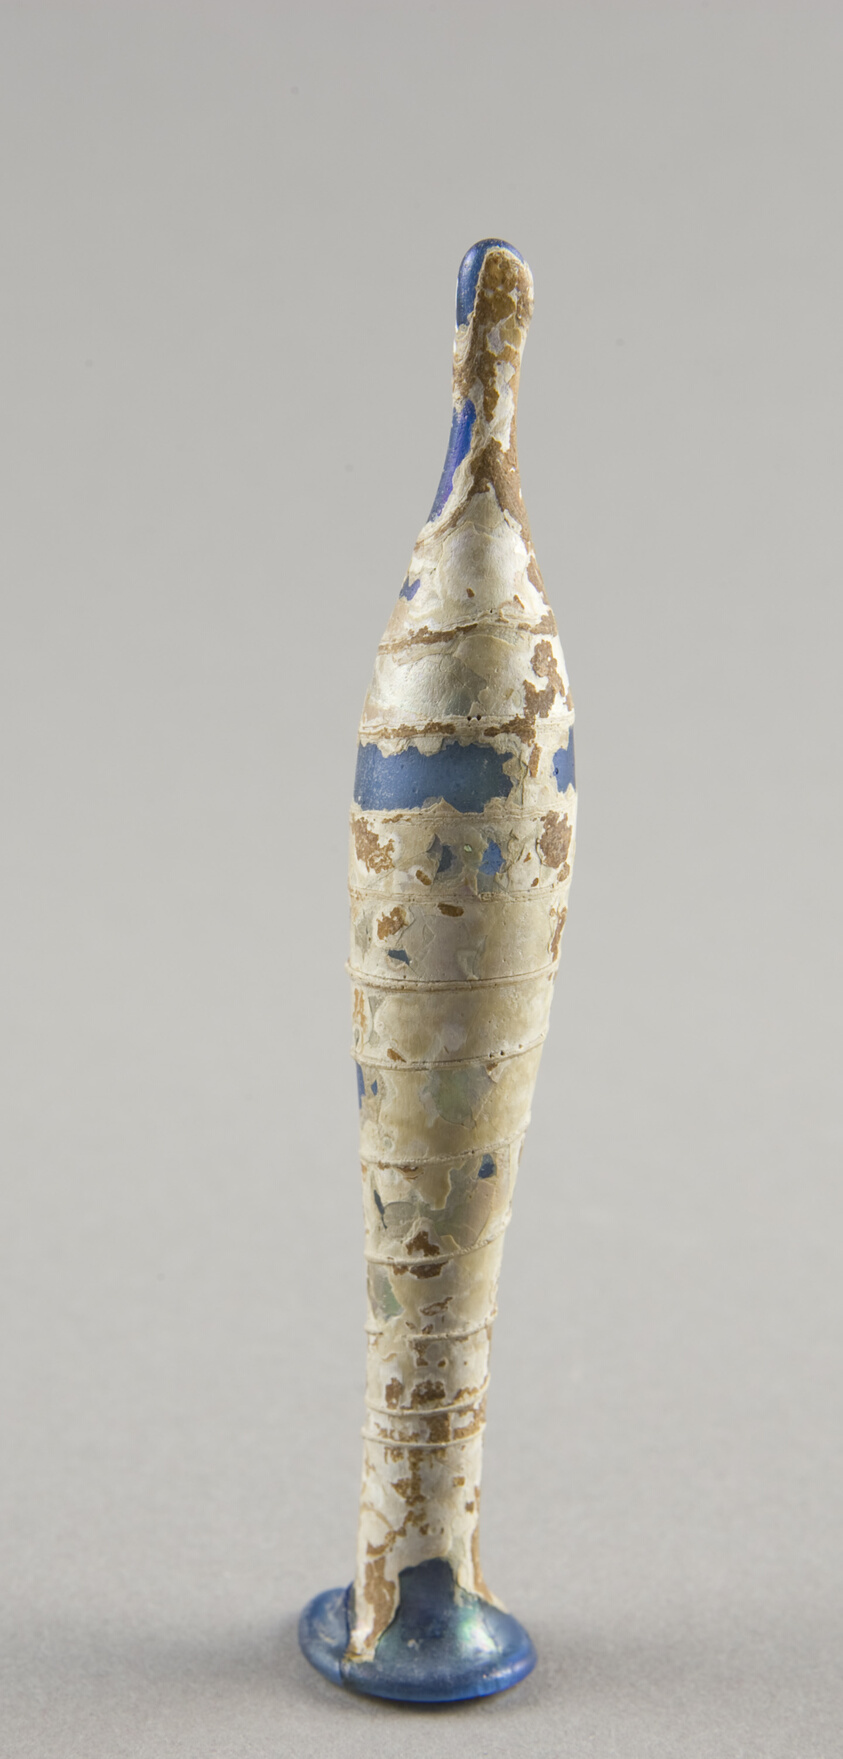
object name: Vessel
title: Bottle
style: ancient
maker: Ancient Mediterranean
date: 1st-2nd century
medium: Glass, blown technique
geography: Mediterranean Region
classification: glass; vessel; ancient art